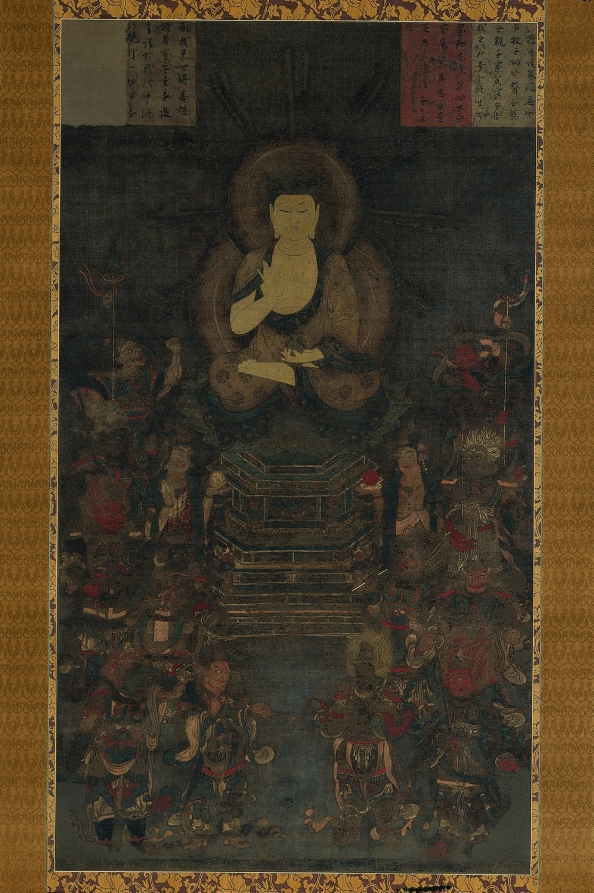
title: Medicine Master Buddha and the Twelve Divine Generals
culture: Japan, Kamakura period (1185–1333)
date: 1200s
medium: Hanging scroll painting; ink, color, gold, and silver on silk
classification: Painting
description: From the 700s, people in Japan began praying to the Medicine Master Buddha (Yakushi Nyorai) for longevity. Yakushi is at the center of this image, flanked by the bodhisattvas of the sun and moon, Nikkō and Gakkō. The Twelve Divine Generals, a group of protective deities, surround him. Yakushi sits in a meditative pose with his right hand in a gesture bestowing fearlessness while his left hand holds a medicine jar. In the upper part of the painting, rectangles simulating decorative paper inscription slips contain excerpts from a sacred text about Yakushi, in which he asks that sick people who speak his name should become well and that all who hear his name might have their purity restored.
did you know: Each of the Divine Generals has an identifying zodiac animal in his hair or headdress.